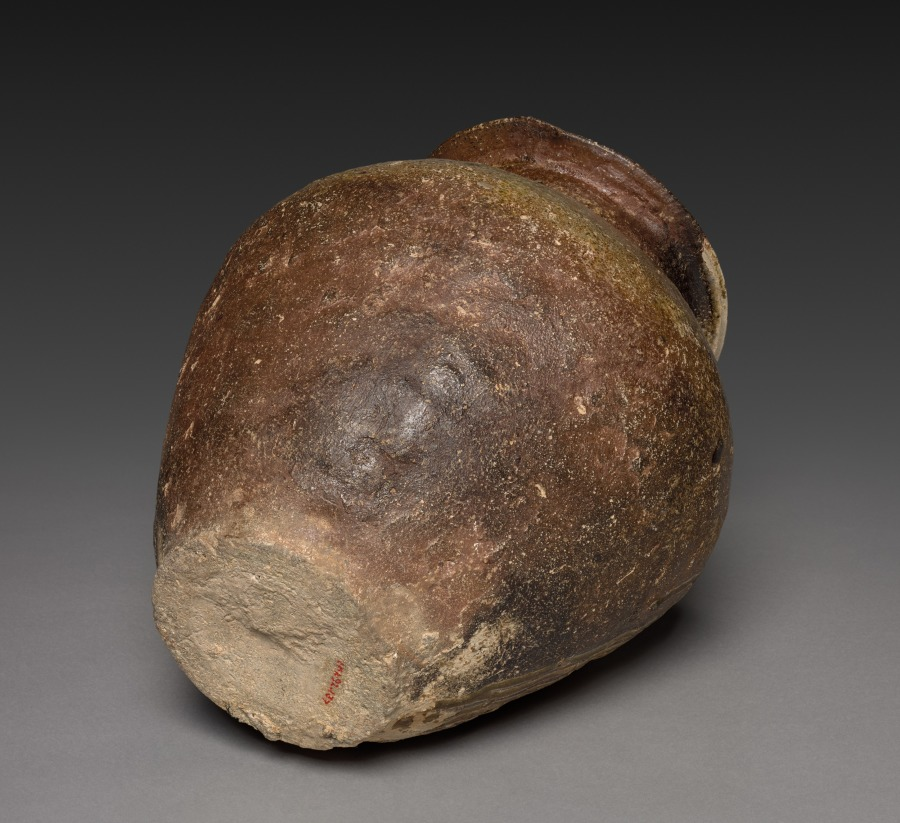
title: Storage Vessel: Tokoname Ware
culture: Japan, Heian period (794–1185)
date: 1100s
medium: stoneware with natural ash glaze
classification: Ceramic